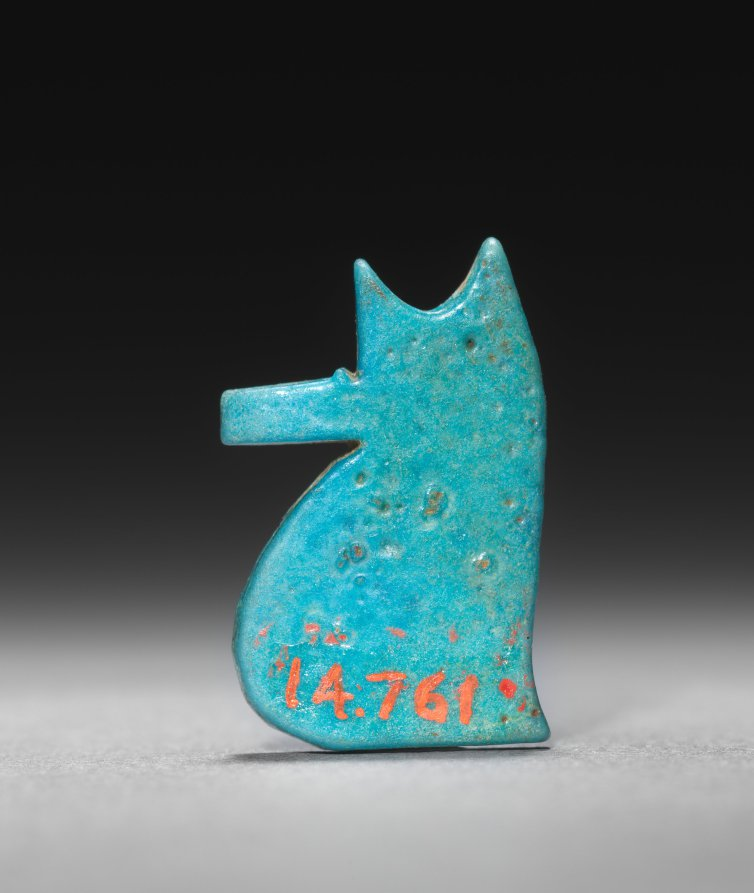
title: Eye of Horus Amulet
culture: Egypt, Third Intermediate (1069–715 BCE), Dynasties 22–25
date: 945–715 BCE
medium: turquoise faience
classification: Amulets